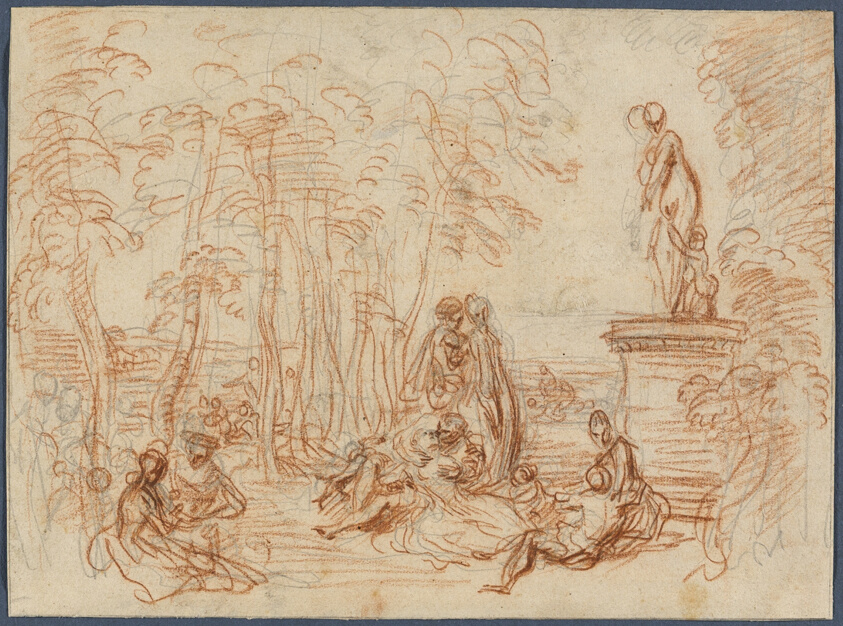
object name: Drawing and Watercolor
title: Study for The Feast of Love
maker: Jean Antoine Watteau (French, 1684-1721)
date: c. 1717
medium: Red chalk and graphite on buff laid paper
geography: France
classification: chalk; drawings (visual works); prints and drawing